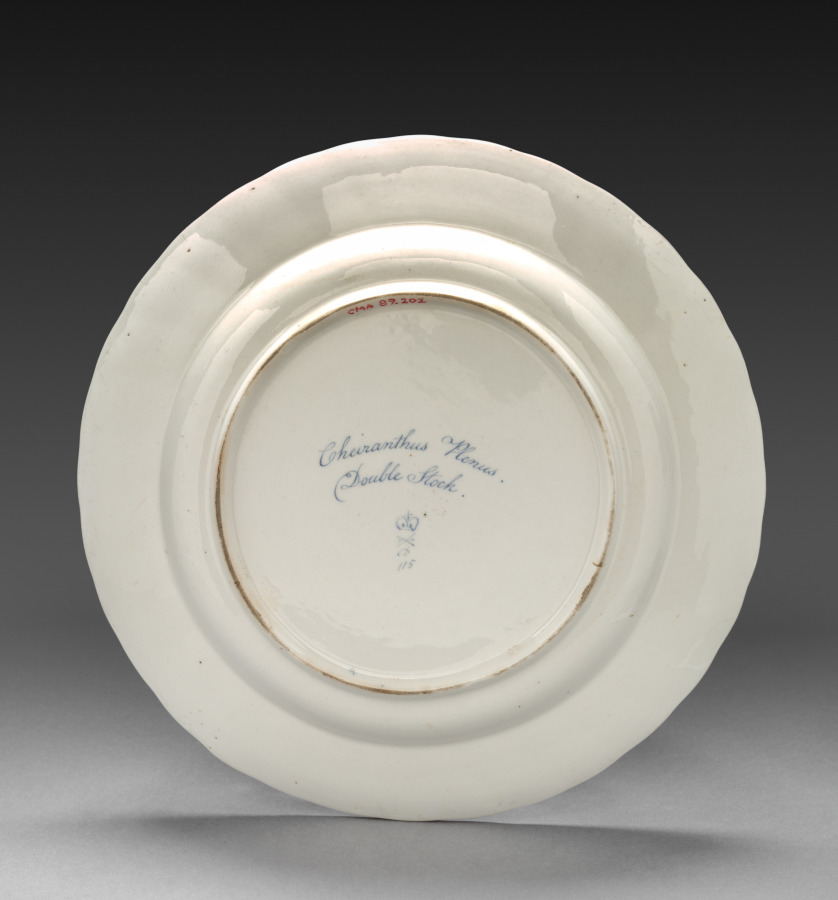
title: Plate from Dessert Service: Double Stock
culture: England, Derby, 18th century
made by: Derby (Crown Derby Period) (British)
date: c. 1800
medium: porcelain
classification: Ceramic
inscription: inscribed in blue on back: Cheiranthus Plenus./Double Stock./crown/crossed batons and dots/D/115. Near edge in blue: 9.